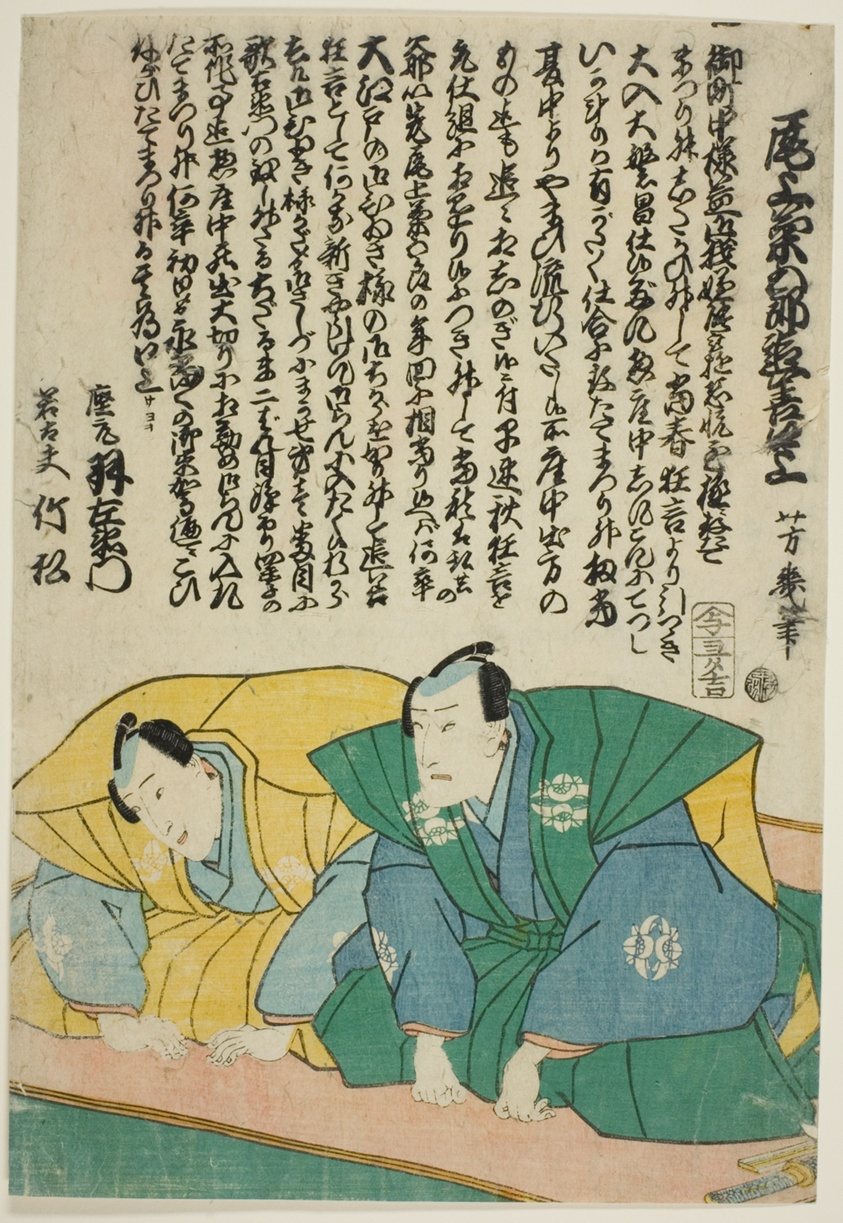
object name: Print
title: The Actors Ichimura Uzaemon XIII and Ichimura Takematsu III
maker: Utagawa Yoshiiku (Japanese, 1833-1904)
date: 1862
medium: Color woodblock print; oban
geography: Japan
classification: print; asian art